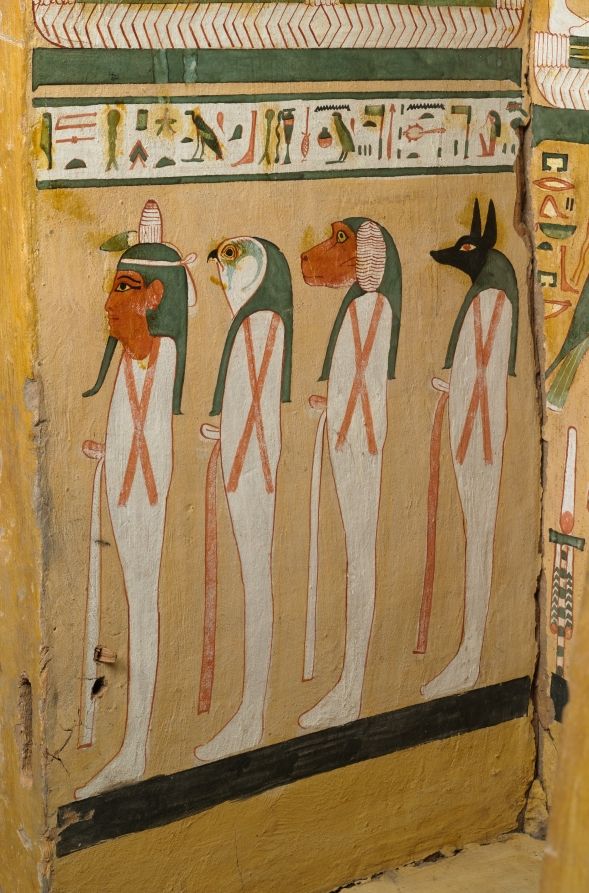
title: Coffin of Bakenmut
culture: Egypt, Thebes, Third Intermediate (1069–715 BCE), Dynasties 21–22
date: c. 1000–900 BCE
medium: gessoed and painted sycamore fig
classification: Funerary Equipment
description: The coffin of Bakenmut is one of the finest examples of painted wooden coffins made for the priests of Amen and their families at Thebes during Dynasty 21 and early Dynasty 22. The pharaohs of this time were no longer buried in the Valley of the Kings, but instead built tombs in the Delta, far to the north, where they resided. Security was lax in the Theban necropolis. The coffins and funerary goods of the wealthy citizens of Thebes were placed in unmarked and undecorated family tombs cut into the cliffs on the west bank of the Nile. All the care and detail that in more prosperous times were devoted to the decoration of the tomb chapel were now lavished on the elaborately painted coffins. Every available surface is crowded with religious scenes, images of funerary gods and goddesses, protective spells, and magical symbols. The deceased appears mummiform. An elaborate floral collar entirely covers the upper body, exposing only the separately attached hands (now lost). A pair of red "mummy braces" are crossed over the chest, their point of intersection marked by a winged sun disk. The lower body is covered with tiny figures modeled in gesso against a yellow background, which gives the effect of gold inlaid with glass or semiprecious stone. The decoration on the interior features two deified dead kings of Dynasty 18. Although these rulers had lived centuries before, memory of their greatness was still very much alive. The main scene near the top depicts Tuthmosis III, the great military pharaoh, who lived 500 years before Bakenmut. Posed as a mummy, the ruler wears a brilliant feathered garment enfolding him with falcon’s wings. The scene below features back-to-back seated images of Amenhotep I, regarded as the patron of the Theban cemetery and worshiped as a local god there.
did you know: Originally another smaller coffin was placed inside this outer coffin and in that the deceased with a mummy board would have rested.